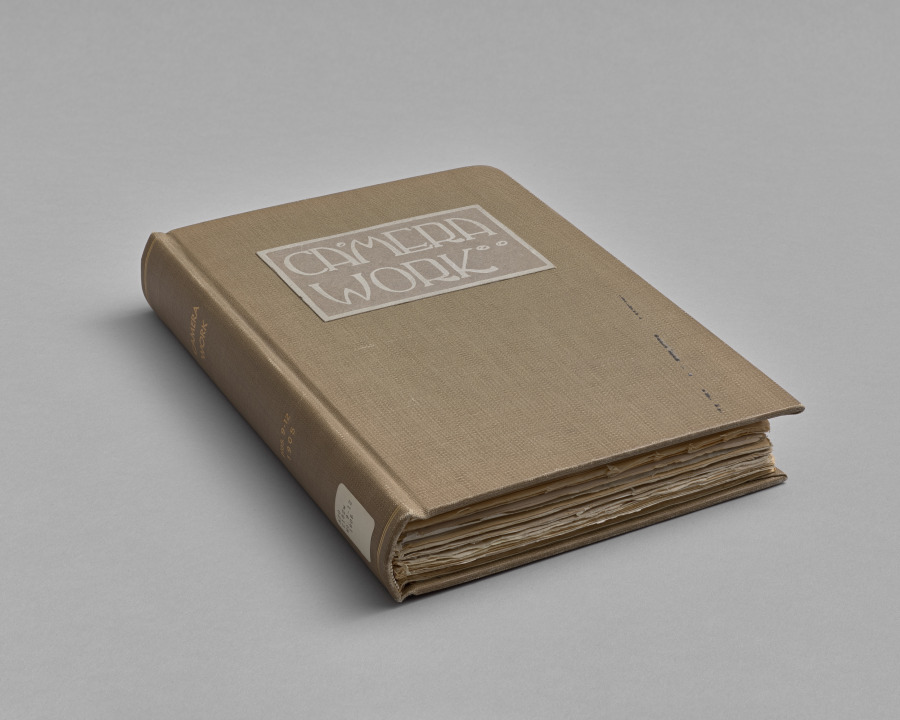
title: Camera Work: Number 11, July 1905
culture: England, 20th century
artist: A. Horsley Hinton (British, 1863–1908)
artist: David Octavius Hill (British, 1802–1870)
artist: and Robert Adamson (British, 1821–1848)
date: 1905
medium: photogravure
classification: Bound Volume